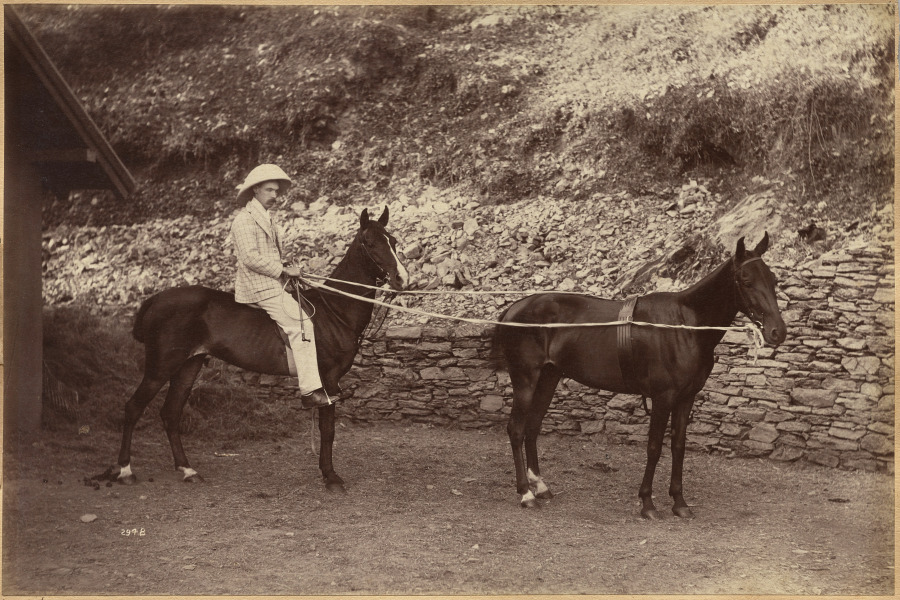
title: Captain H.S. Rawhinson (recto)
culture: India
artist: Raja Deen Dayal (Indian, 1844–1905)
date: c. 1882–87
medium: albumen print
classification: Photograph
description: These photographs are part of an album, now disassembled, of around 105 photographs taken in India between 1885 and summer 1887 that provide glimpses into the lives of the British colonial elite and royal and upper-class Indians. The museum holds another group of 37 pictures from this album (2016.266), which was probably commissioned by a British civil servant visiting or working in India around 1888 as a personal souvenir of his experiences there.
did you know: Raja Deen Dayal is regarded now, and was considered during his lifetime, to be India’s most important 19th-century photographer.